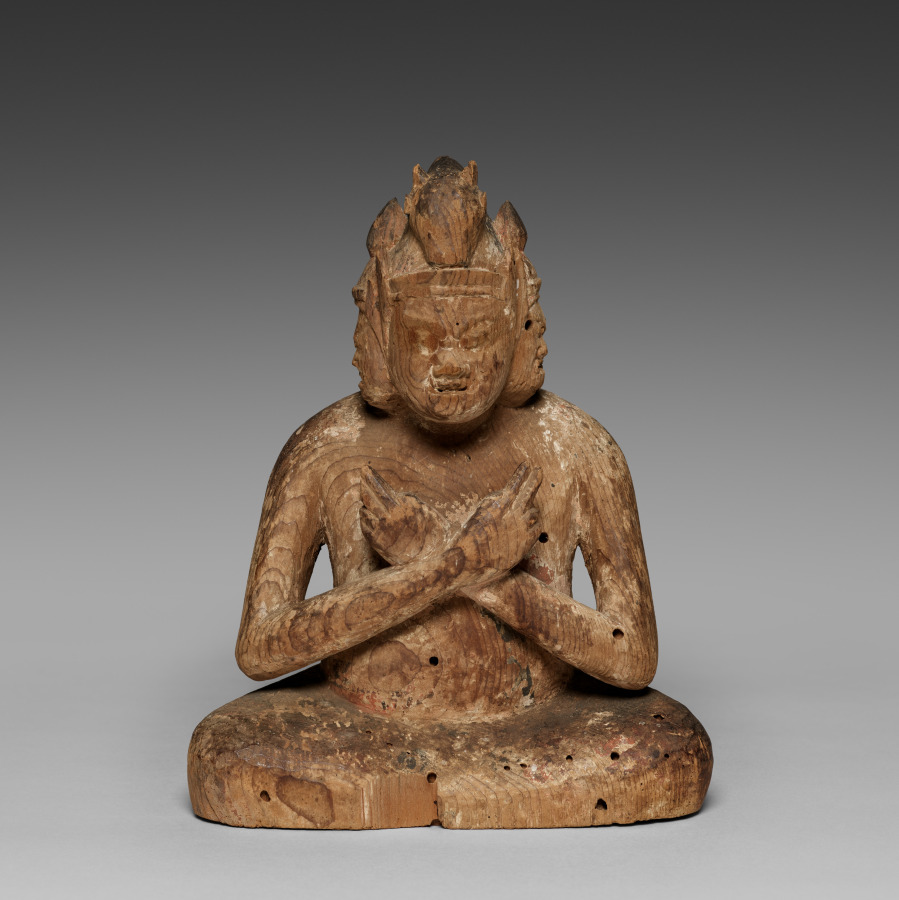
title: Gozu Tennō (Ox-Headed Plague Deity)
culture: Japan, Heian period (794–1185)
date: 1100s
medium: Wood with traces of color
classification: Sculpture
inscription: Object has wood storage box made and inscribed by former owner, sculptor Hirakushi Denchū (1872–1979). Inscription on face of box lid reads: Gozu Tennō sonzō (sculpture of Gozu Tennō [Ox-Headed Deity of Plague] 牛頭天王尊像); inscription on inside of box lid reads: made in the latter part of the Heian period, respectfully inscribed by Hirakushi Denchū [age] 99, February 1970 (平安朝後期作昭和四十五年二月 九十九 平櫛田中 拝題）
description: Gozu Tennō is a deity who is capable of both bringing epidemics and dispelling them. His name is literally “Ox-Headed Celestial King.” He usually has three heads with an ox-head rising above his primary face. He sometimes holds a lasso and sword or an ax, but here holds his hands in a powerful gesture that may be designed to repel illness or promote healing.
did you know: The Gion Festival in Kyoto is related to belief in Gozu Tennō.